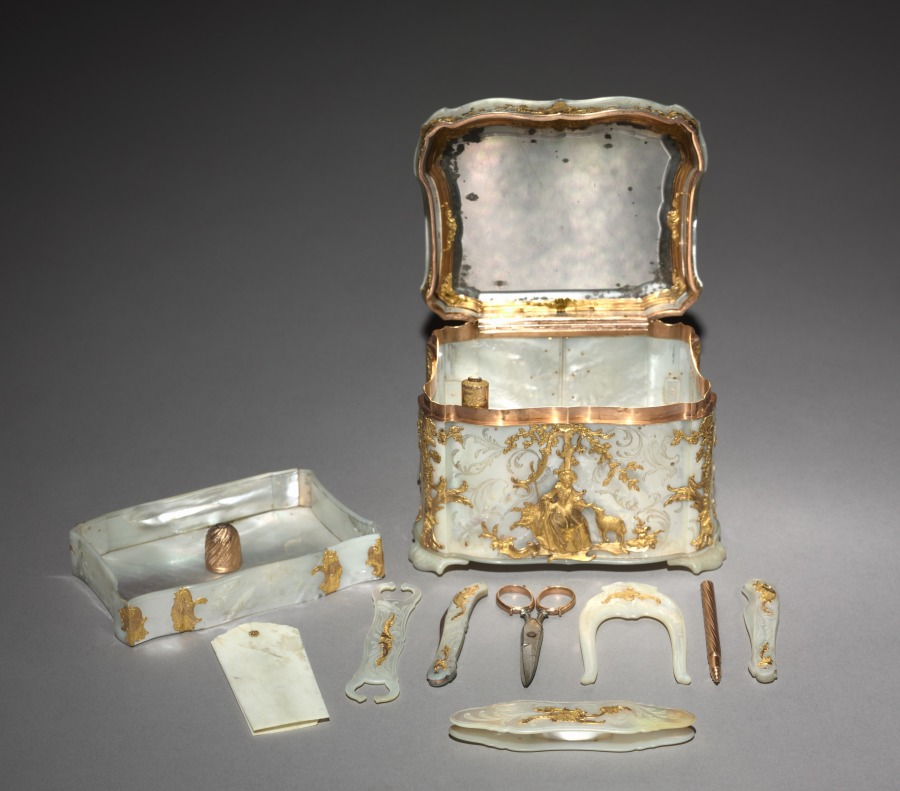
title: Sewing Box with Implements (Nécessaire)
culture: Austria, possibly Vienna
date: c. 1765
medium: gold and mother-of-pearl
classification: Miscellaneous